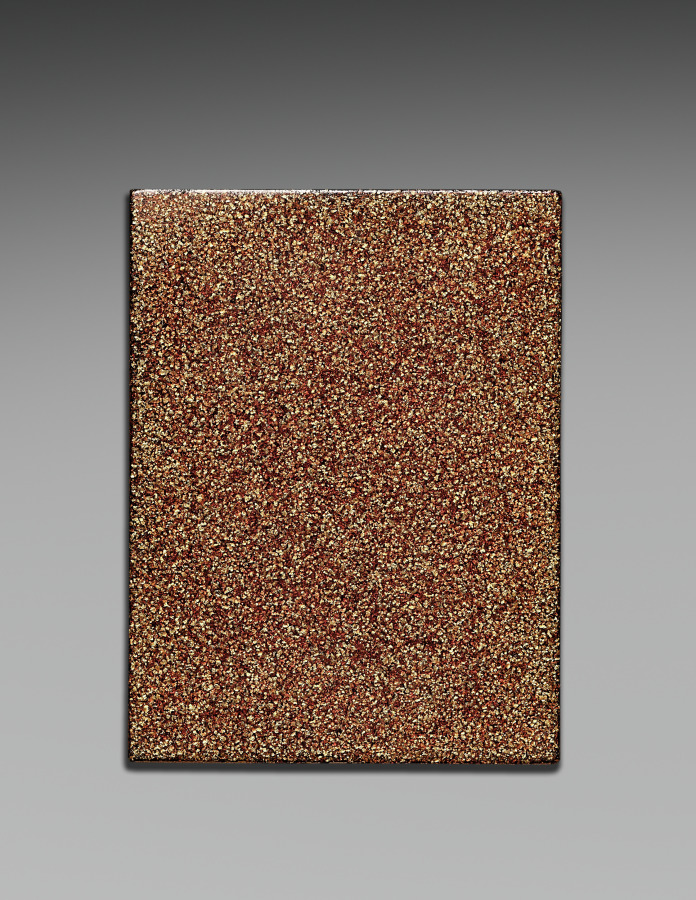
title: Nested Boxes with Chrysanthemums (inner box)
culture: Japan, Meiji period (1868–1912)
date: early 1900s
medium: lacquer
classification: Lacquer